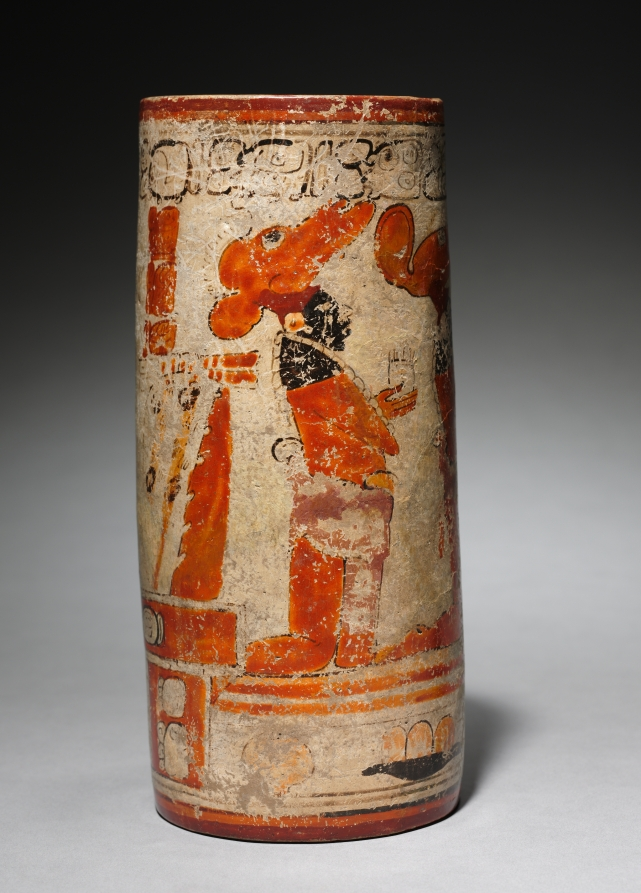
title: Painted Vase with Ruler and Scribe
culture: Guatemala, Northern Peten or Mexico, Southern Campeche, Maya, late Classic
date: 600–900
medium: pottery with burnished, colored slips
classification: Ceramic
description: Among Maya noble families, finely painted ceramic vessels were used as fancy tableware, treasured gifts that secured the support of allies, and funerary offerings placed in tombs. Accordingly, the vessels’ imagery varies from religious themes to scenes of courtly life. Here, two attendants kneel before an enthroned nobleman who wears an enormous bird-head headdress.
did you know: A string of death glyphs below the rim departs from the Primary Standard Sequence.